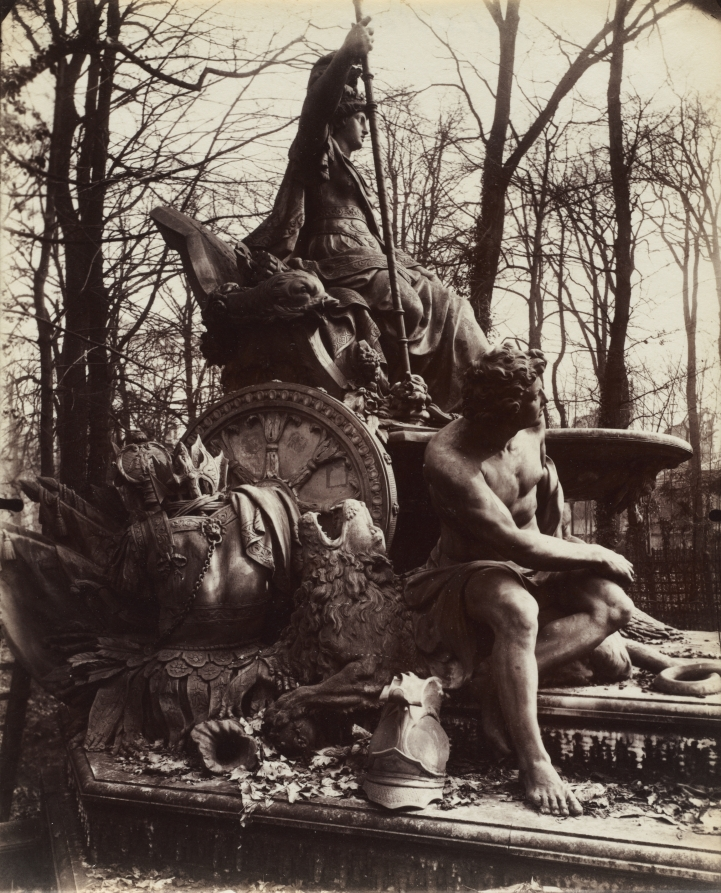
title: Versailles, Fountain of Triumphant France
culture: France, 20th century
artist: Eugène Atget (French, 1857–1927)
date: 1904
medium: albumen print, gold toned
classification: Photograph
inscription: Written in pencil on verso: "Versailles"; "#6493"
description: From 1901 until his death in 1927, Atget devoted much of his time to documenting châteaus and parks in and around Paris. Initially and most frequently, he was attracted to the gardens of Versailles, first working there until 1906. This intriguing detail of the Fountain of Triumphant France isolates two of its three allegorical figures: the seated representation of the French Empire behind Jean-Baptiste Tubi’s sculpture denoting Spain. The fountain was commissioned by Louis XIV to celebrate the French victory over Spain and Holland. The sharply focused composition filled with decorative and sculptural details is typical of Atget’s early photographs, which he understood to be "documents for artists"—raw material for painters, sculptors, stage designers, and craftsmen.